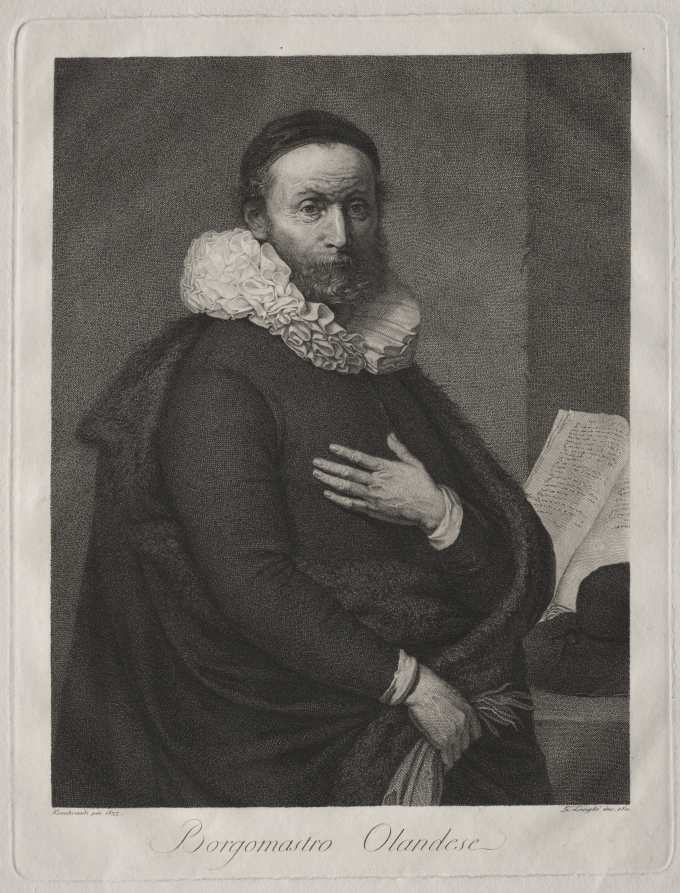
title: The Dutch Burgomaster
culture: Italy, 19th century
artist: Giuseppe Longhi (Italian, 1766–1831)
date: 1811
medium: engraving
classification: Print